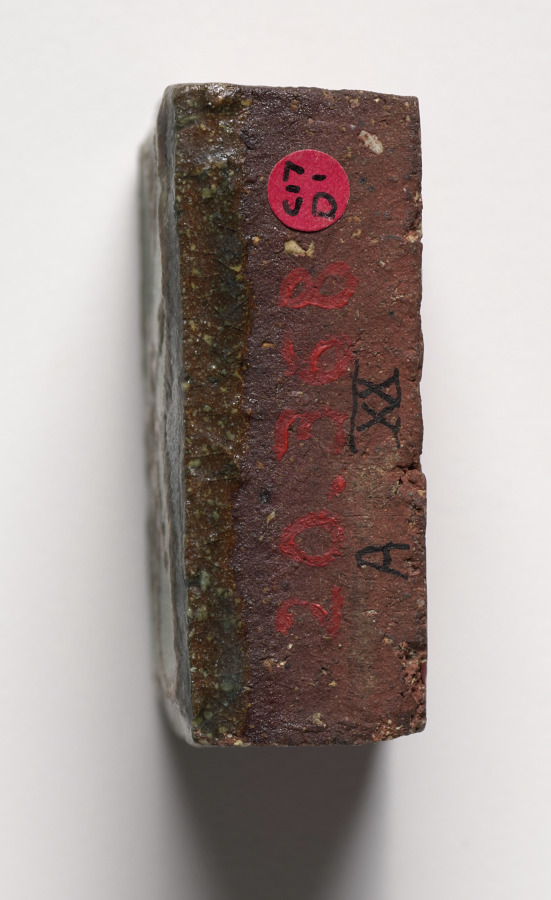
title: Tile- Flower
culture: America, Massachusetts, Boston, Early 20th century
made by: Grueby Pottery Company (American)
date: before 1920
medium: glazed ceramic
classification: Ceramic